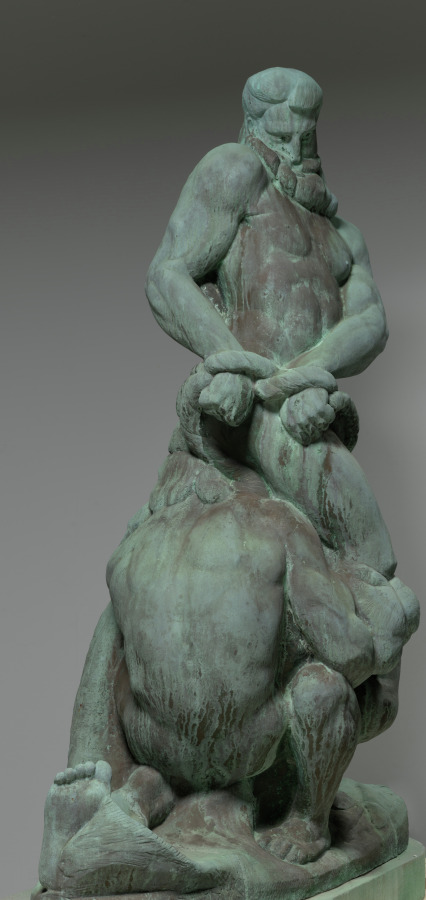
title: The City Fettering Nature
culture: America, Ohio, Cleveland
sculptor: Alexander Blazys (American, born Russian Empire [now Lithuania], 1894–1963)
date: 1927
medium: bronze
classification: Sculpture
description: Alexander Blazys, a Lithuanian immigrant, became a leading sculptor in Cleveland during the 1920s, when he created The City Fettering Nature for the Cleveland Museum of Art’s grounds. In this composition, Utility and Beauty, two characteristics of the city, are shown as intertwined figures attempting to subdue Nature’s power. The brawny figure of Nature, still standing despite this attack, struggles to free himself from the restraints.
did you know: This monumental bronze sculpture weighs 1,500 pounds and requires a crane to install.